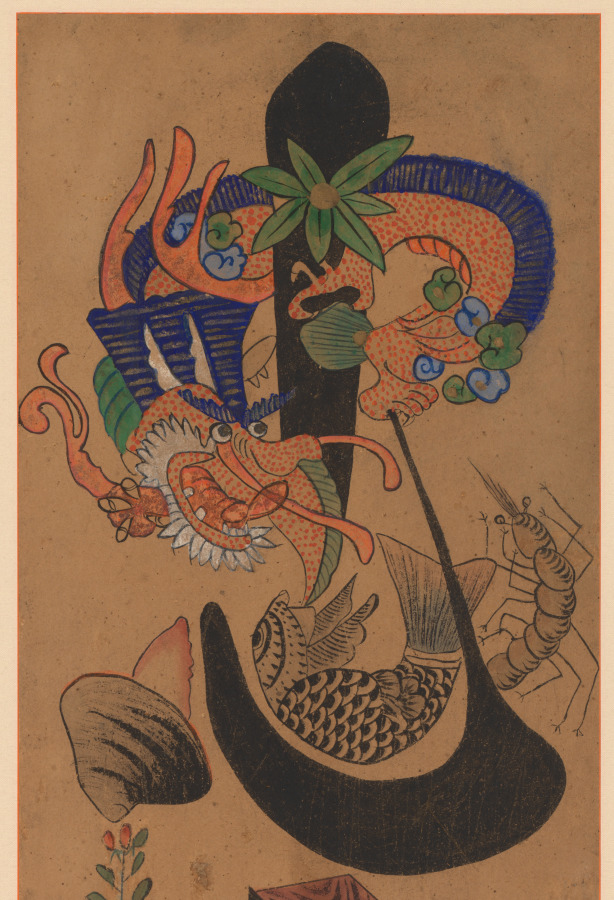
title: Munja-Chaekgeori Screen (Character-Books Screen)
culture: Korea, Joseon dynasty (1392–1910)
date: early 1900s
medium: Eight-panel folding screen, ink on paper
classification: Painting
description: This folding screen is a whimsical harmony of two different subjects: chaekgeori, or books and things; and munja, or characters. The lower section of each panel depicts the imagery of things, including books, decorative arts, and utilitarian objects. The upper portion of each panel bears a classical Chinese character. Read from far right to left, the eight characters refer to the values of Confucian teachings of the Joseon dynasty: filial piety, brotherly love, loyalty, trust, propriety, righteousness, modesty, and humility. While these two pictorial genres are harmoniously conjoined on the same picture plane, two sharply contrasting world views—urban consumerism and traditional Confucian ethics that despise materialism—compete with one another.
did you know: The eight Korean characters each mean filial piety, brotherly love, loyalty, trust, propriety, righteousness or justice, modesty or integrity, and humility or the feeling of shame.